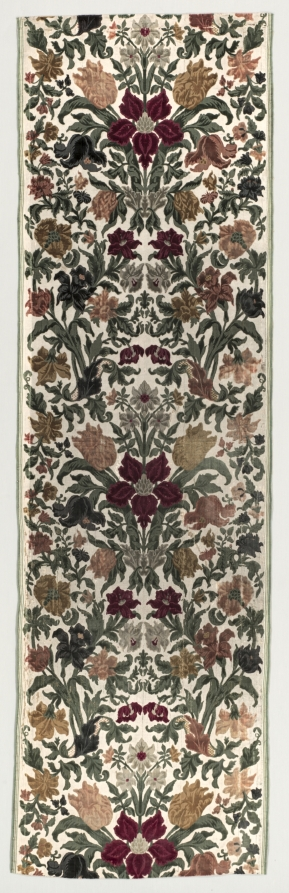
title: Length of Floral Velvet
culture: Italy, Genoa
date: 1600s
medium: velvet (cut, uncut, voided); silk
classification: Velvet